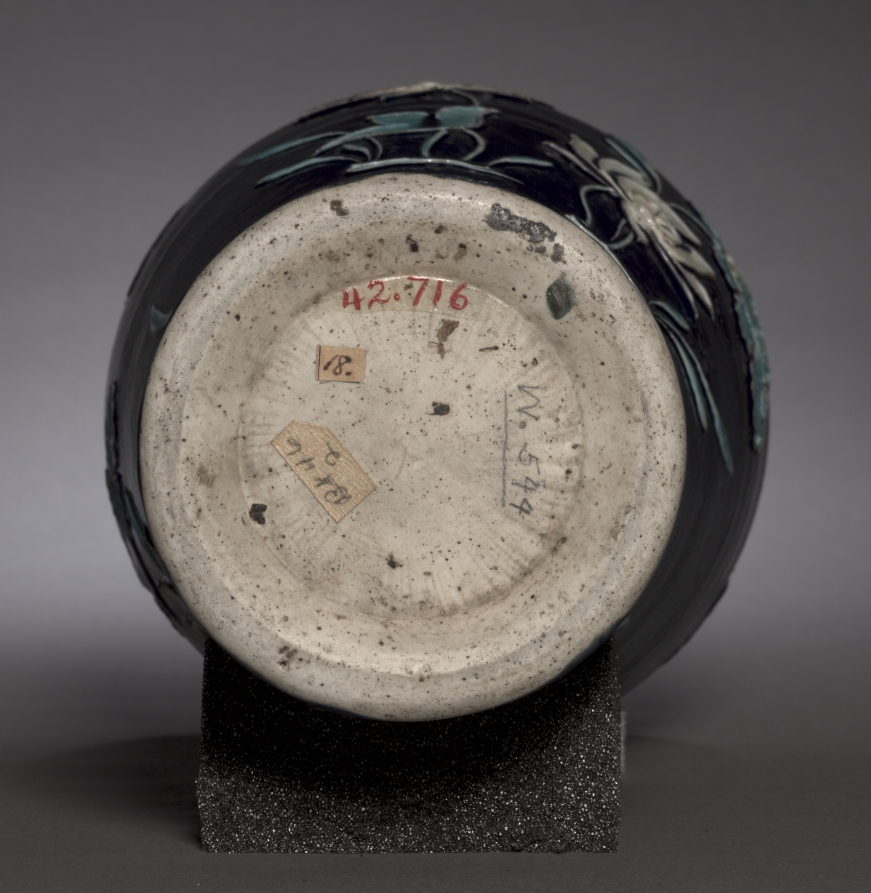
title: Prunus Vase (Meiping) with Blossoming Lotus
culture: China, Jiangxi Province, Jingdezhen kilns, Ming dynasty (1368–1644)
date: late 1400s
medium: Porcelain with polychrome glazes, Fahua ware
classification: Ceramic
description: According to 11th-century poet Zhou Dunyi, “all people like peonies, but I alone like the lotus because it emerges from the mud unstained.” The lotus is a symbol of purity and popular among Chinese literati and in Buddhism. This vase shows lotus flowers rising from the water’s surface depicted in elegant yet simple ripples. Made in a kiln at Jingdezhen in southern China, this vase is an example of the fahua technique—decoration with raised outlines produced by squeezing clay from a tube onto the vase’s surface. Colors are applied to fill the outlines before firing.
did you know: The shoulders of the vase are decorated with ruyi-shaped clouds.